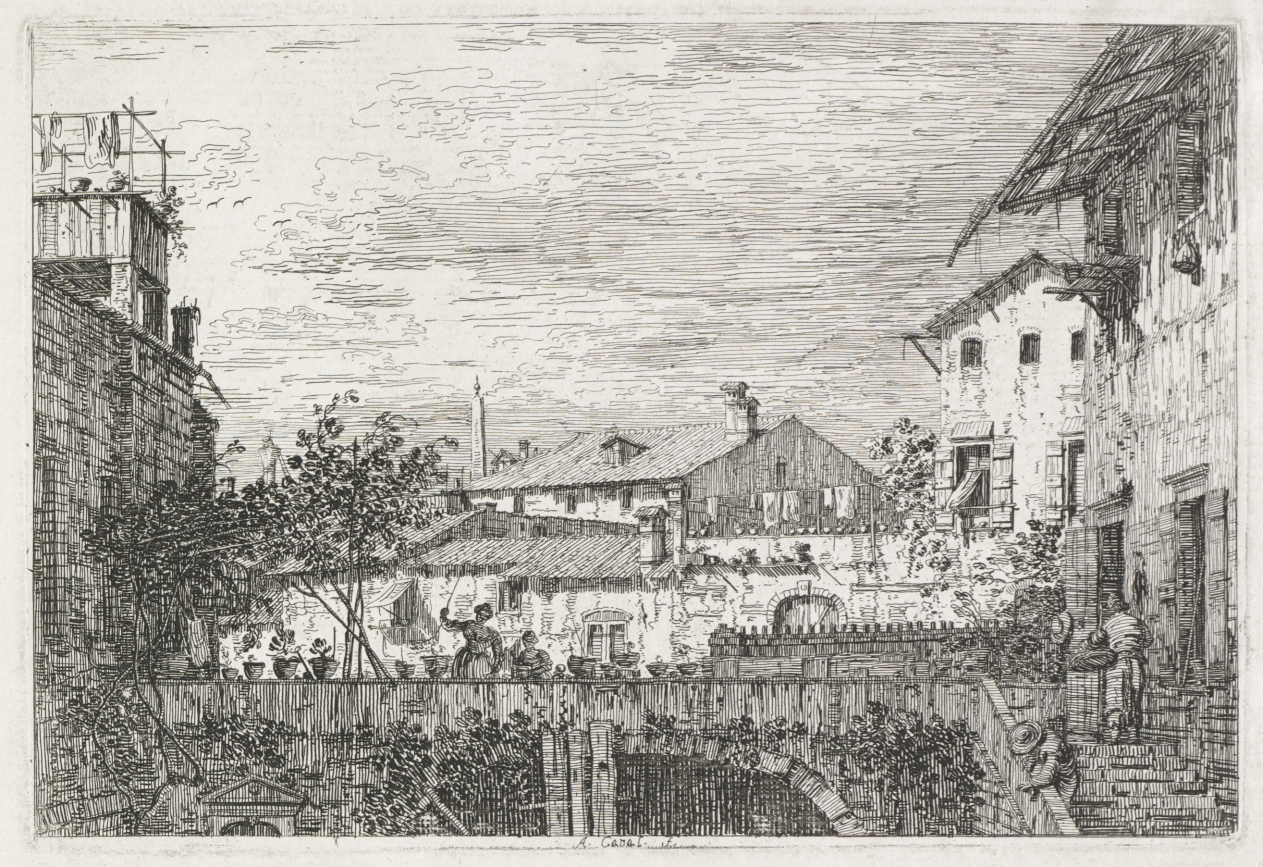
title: Views: The Terrace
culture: Italy, Venice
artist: Antonio Canaletto (Italian, 1697–1768)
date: 1735–1746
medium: etching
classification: Print